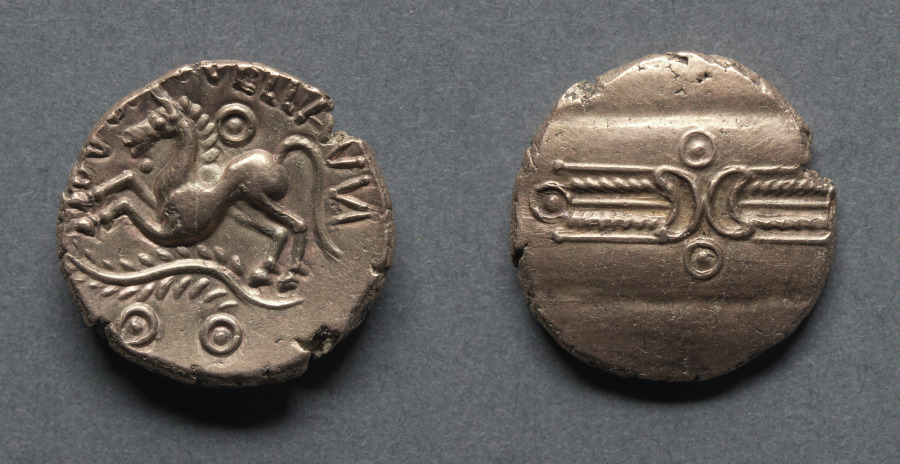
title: Dubnovellaunos Stater: Wreath and Crescents (obverse); Horse with Branch (reverse)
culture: England, Trinovantes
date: 20 BCE–10 CE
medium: gold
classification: Coins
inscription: [DVBNO]VELLAVN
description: Dubnovellaunus was the king of the area around Kent. He was a warlike ruler and at various times possessed territory on both sides of the Thames. He may have succeeded Addedomaros by conquest and ruled over the Trinovantes. He undoubtedly suffered defeat at the hands of Cunobeline of the Catuvellauni and was forced back to Kent. He was one of the British chieftains mentioned with Tincommius on the monument to Augustus at Ancyra in Galatia.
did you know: Dubnovellaunus, an early king of ancient Britain, is known from the discovery of coins that bear his name.